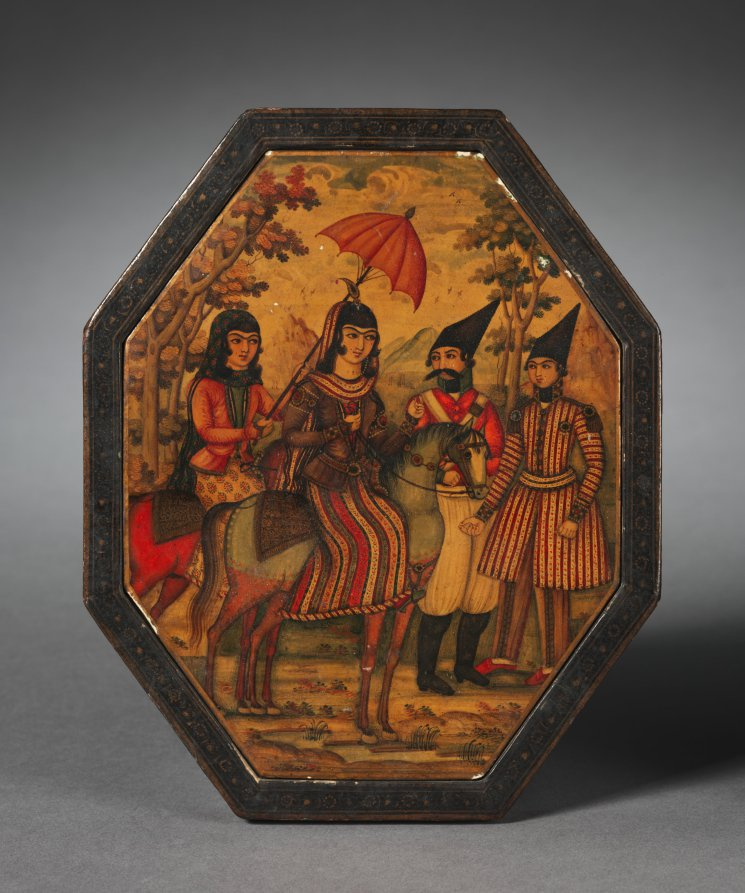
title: Octagonal Mirror Case with Lid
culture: Iran, probably Isfahan, Qajar period (1779–1925)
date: 1800s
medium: Varnished lacquer and opaque watercolor over papier-mâché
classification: Lacquer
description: This mirror case focuses on a single female figure shown on both the interior and exterior of the case. Although she wears a slightly different ensemble in the painting inside the lid, the woman has the same henna tattoo on her throat. On the exterior she is mounted on horseback and wears a jacket embroidered with gems and pearls over a pair of wide-legged trousers, typical for ladies of the Qajar court. Her bold continuous eyebrow, kohl-lined eyes, and henna-dyed fingernails accord with Qajar fashion.